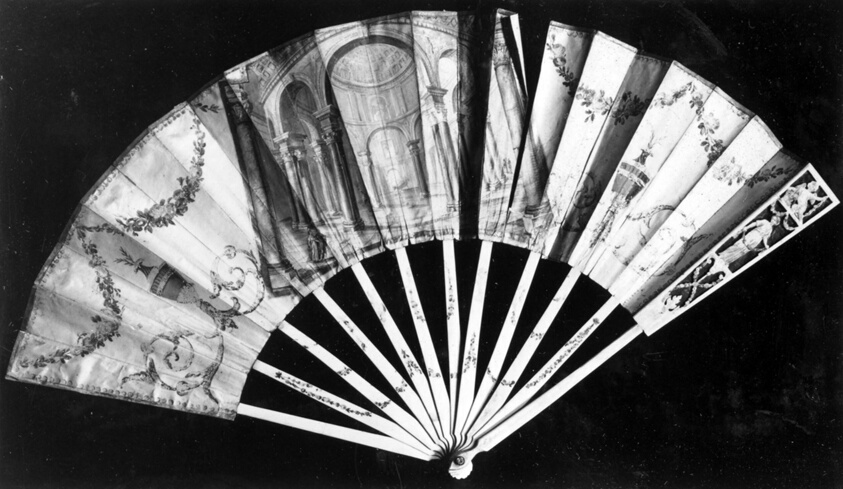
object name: Costume and Accessories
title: Fan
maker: France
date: 1701/25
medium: Painted ivory sticks and guards; painted skin mount; rhinestone rivet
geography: France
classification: textile; fan - misc; costume accessory - folding fan; costume